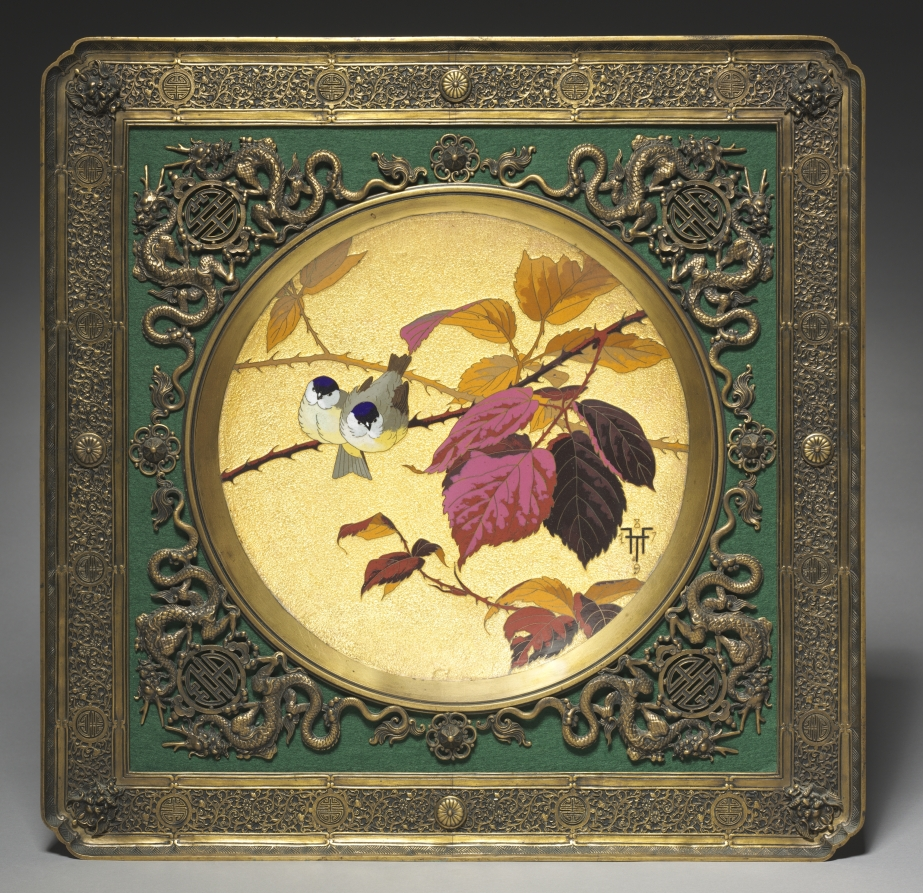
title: Wall Charger Depicting Two Birds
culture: France, 19th century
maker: Edouard Lievre (French, 1829–1886)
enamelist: Fernand Thesmar (French, 1843–1912)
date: 1879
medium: cloisonné and painted enamel mounted in gilt metal frame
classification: Enamel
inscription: on front of the plaque, monogrammed and dated 1879.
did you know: After Japan was opened to the West in the 1860s, Western craftsmen exposed to these new artistic sensibilities popularized the delicate natural and floral motifs that were characteristic of Japanese design.